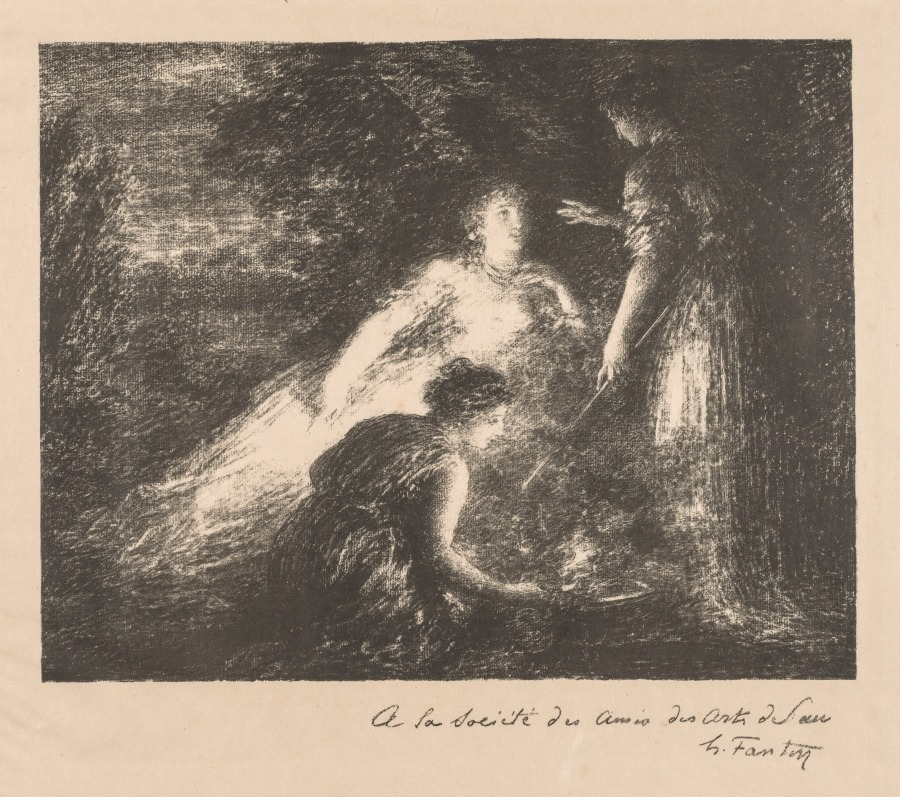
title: Witchcraft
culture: France, 19th century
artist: Henri Fantin-Latour (French, 1836–1904)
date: 1899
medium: lithograph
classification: Print